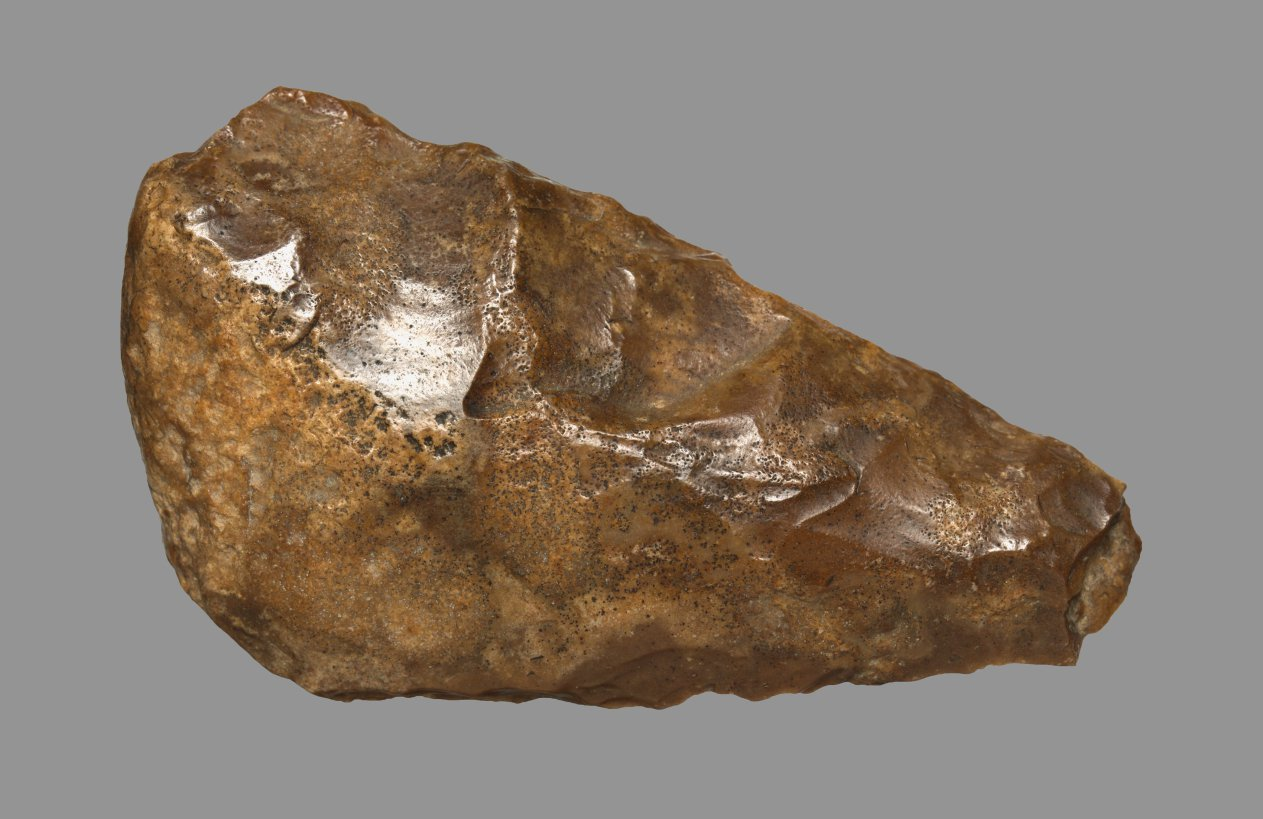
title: Hand Axe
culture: Egypt, Haraga, Paleolithic period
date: before c. 10,000 BCE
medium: dark-brown-colored flint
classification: Implements